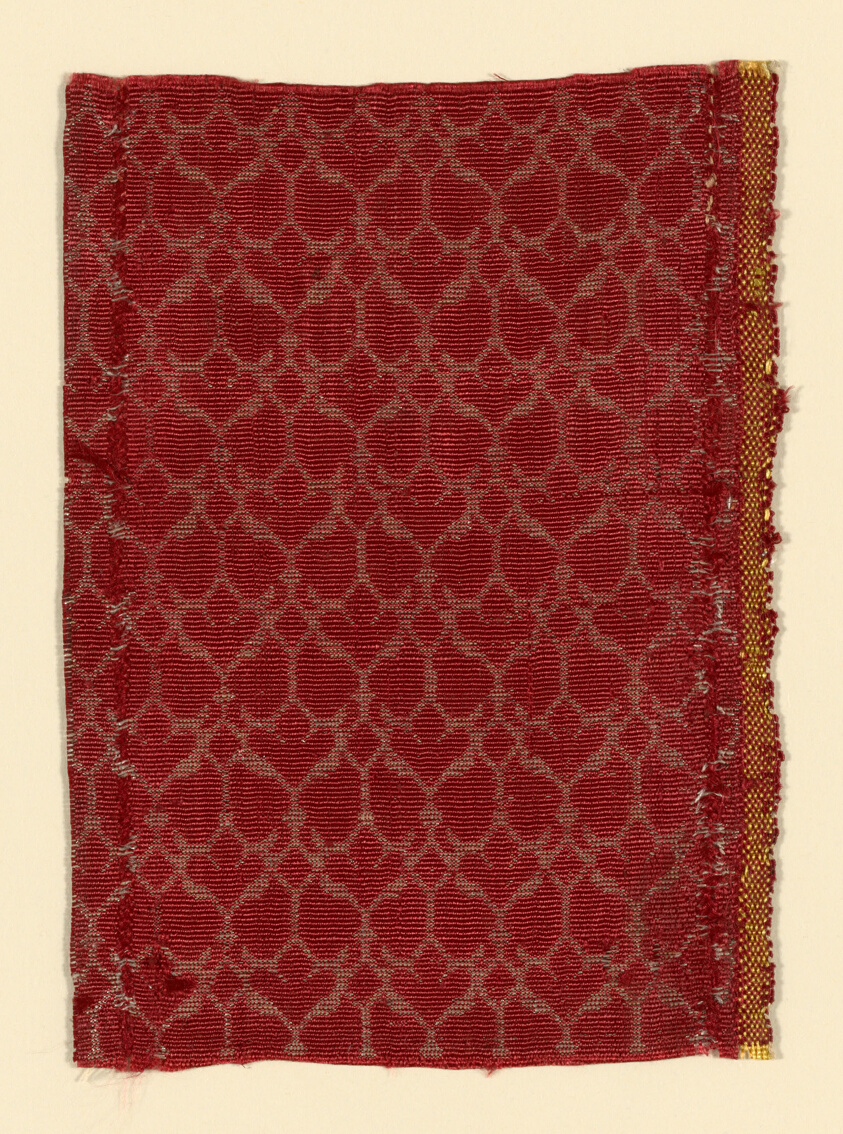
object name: Textile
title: Fragment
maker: Italy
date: 1625/75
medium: Silk, plain compound cloth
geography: Italy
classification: textile; weaving